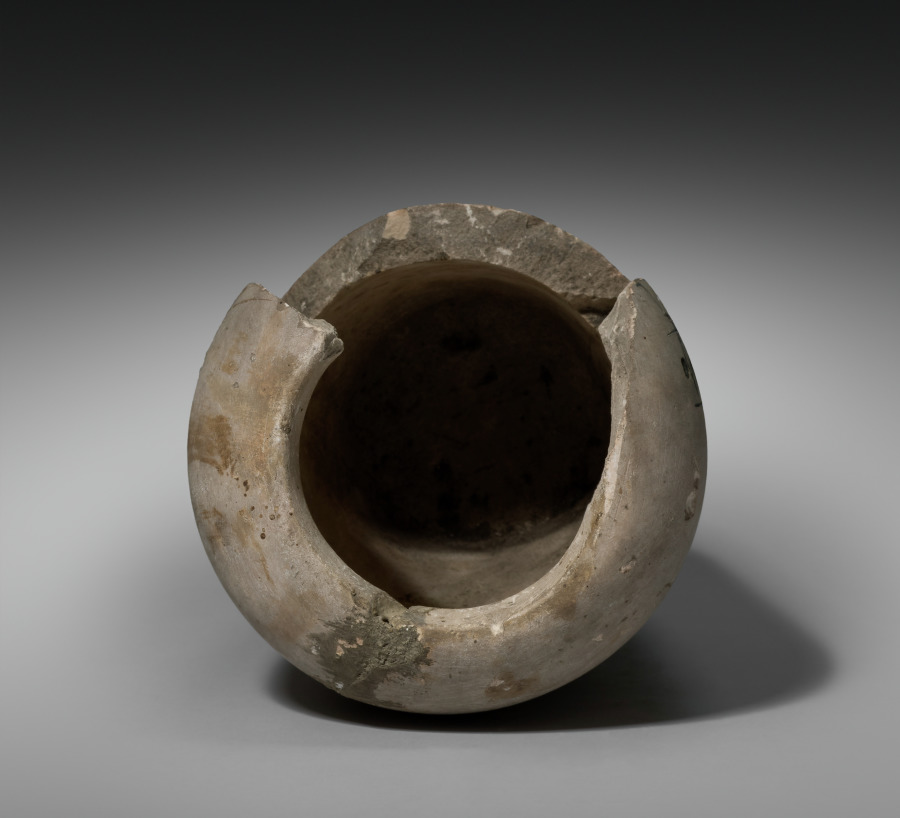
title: Canopic Jar with Lid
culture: Egypt, New Kingdom (1540–1069 BCE), Dynasty 18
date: 1540–1296 BCE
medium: limestone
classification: Funerary Equipment